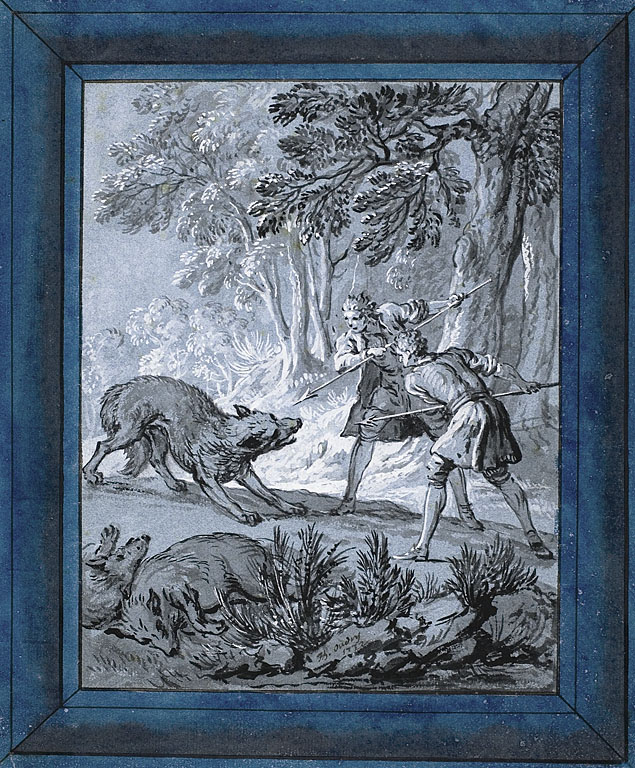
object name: Drawing and Watercolor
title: Men Attacking Wolves ("Rien de Trop III")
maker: Jean-Baptiste Oudry (French, 1686-1755)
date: 1732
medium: Brush and black ink, with gray wash and black-and-white gouache, on blue laid paper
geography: France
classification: pen and ink drawings; drawings (visual works); prints and drawing